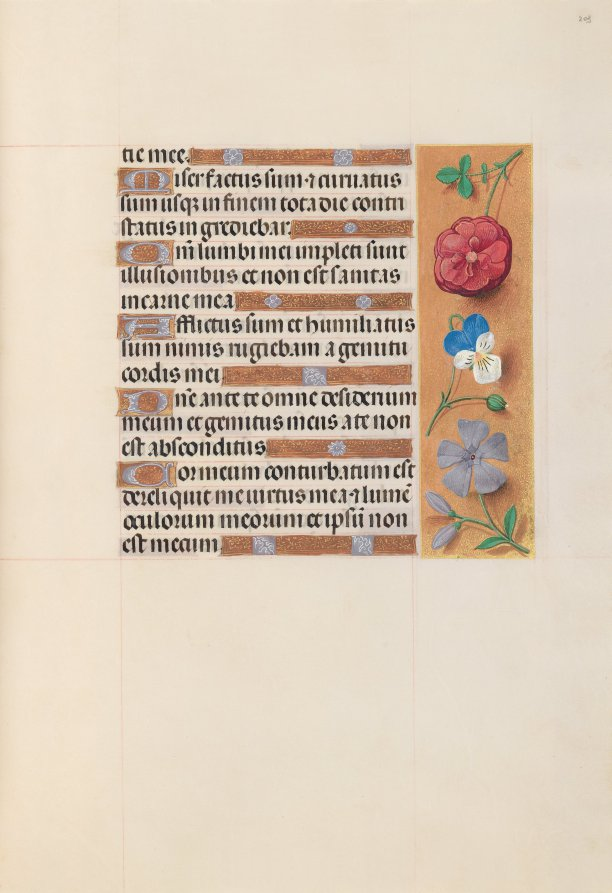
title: Hours of Queen Isabella the Catholic, Queen of Spain: Fol. 203r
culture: Flanders, Ghent and Bruges, late 15th century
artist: Master of the First Prayerbook of Maximillian (Flemish, c. 1444–1519)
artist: and Associates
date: c. 1500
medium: ink, tempera, and gold on vellum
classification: Bound Volume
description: This manuscript was illuminated by a circle of at least five highly organized manuscript painters active in the Flemish cities of Ghent and Bruges. The principal illuminator was Alexander Bening, who painted the majority of the book's miniatures. Manuscripts produced by this circle of artists are renowned for the decoration of their borders, which typically feature a rich variety of realistically-painted flowers, birds, and butterflies. This prayer book, called a book of hours, was intended not for a cleric, but for the private devotions of a lay person-in this case, Isabella the Catholic, Queen of Spain (1451-1504). Isabella's coat of arms embellishes the book's frontispiece. It is unlikely that the book was commissioned by the Queen herself; rather, she probably received it as a diplomatic gift from someone courting her patronage, perhaps Cardinal Francisco Jimenez de Cisneros. A Franciscan friar, Jimenez was dependent upon Isabella for his advancement, first to the post of Queen's confessor in 1492, and then to Archbishop of Toledo in 1495.